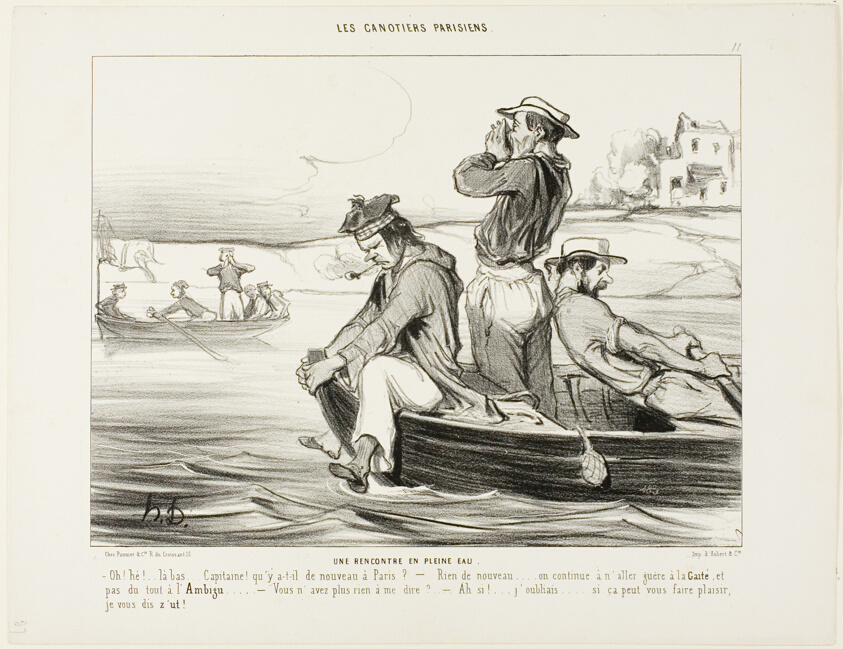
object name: Print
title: An Encounter in Open Water. “- Hello... down there... Captain.., what's new in Paris? - Nothing new really... still no one goes to the Gaieté or the Ambigu. - Don't you have anything else to tell me? - Oh yes,... I forgot... I hope you like it... shut up!,” plate 11 from Les Canotiers Parisiens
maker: Honoré Victorin Daumier; French, 1808-1879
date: 1843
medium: Lithograph in black on white wove paper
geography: France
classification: lithograph; print; prints and drawing